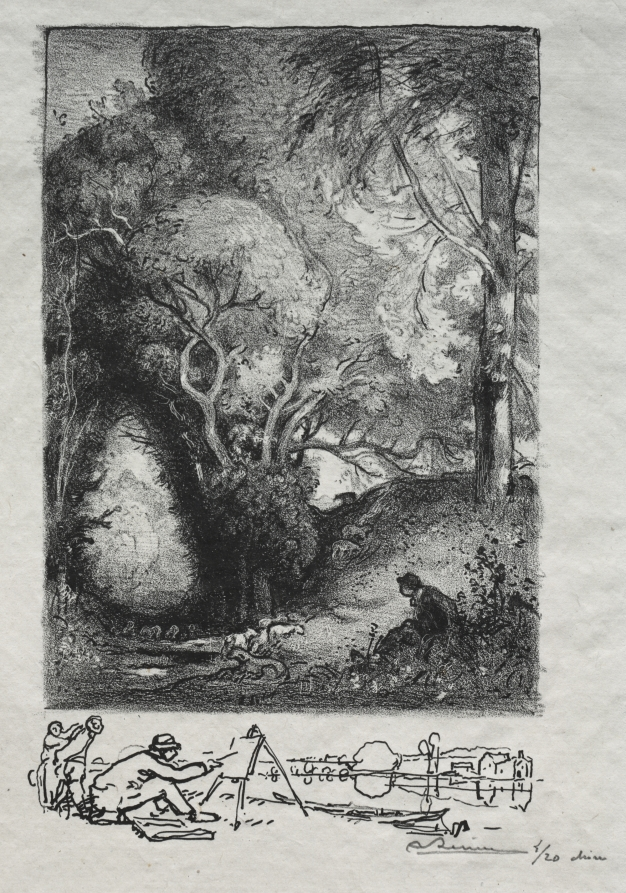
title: La Ravine en juin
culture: France, late 19th-early 20th Century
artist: Auguste Louis Lepère (French, 1849–1918)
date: 1913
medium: lithograph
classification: Print